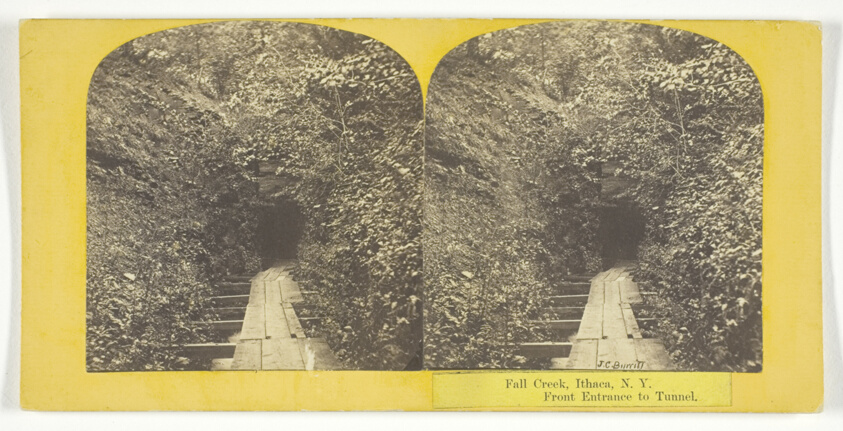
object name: Photograph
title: Fall Creek, Ithaca, N.Y. Front Entrance to Tunnel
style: 19th century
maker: J. C. Burritt; American, active 1860s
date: 1860/65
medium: Albumen print, stereo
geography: Ithaca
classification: photography; photograph; albumen silver print; stereograph (albumen)